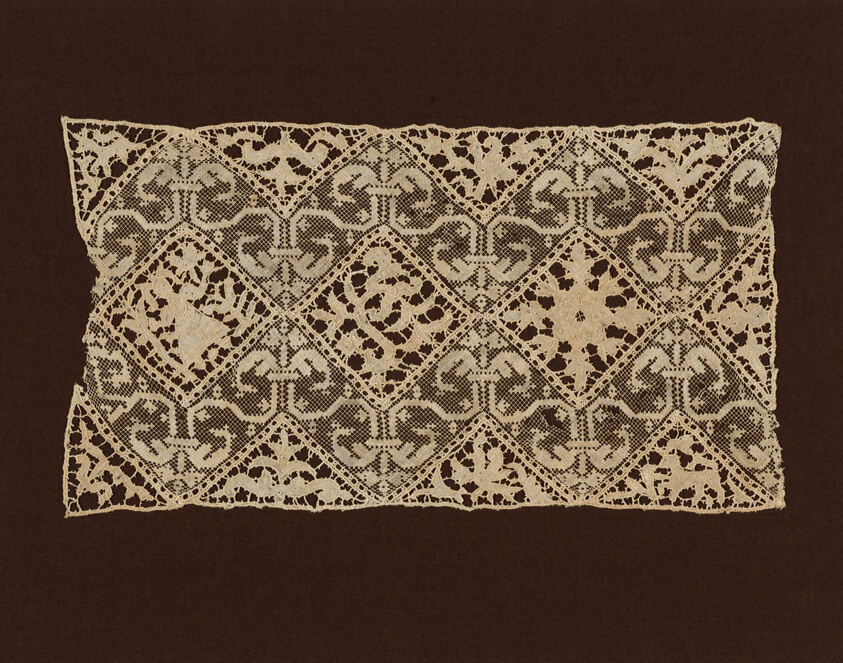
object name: Textile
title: Fragment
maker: Italy or Spain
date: Late 17th to early 18th century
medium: Linen, bands of knotted square netting embroidered in cloth stitch; inserts of linen, plain weave; cut work embroidered in buttonhole, four-sided, and squared ground stitches; buttonhole bars and rings and bullion picots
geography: Italy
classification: textile; needlework (visual works)